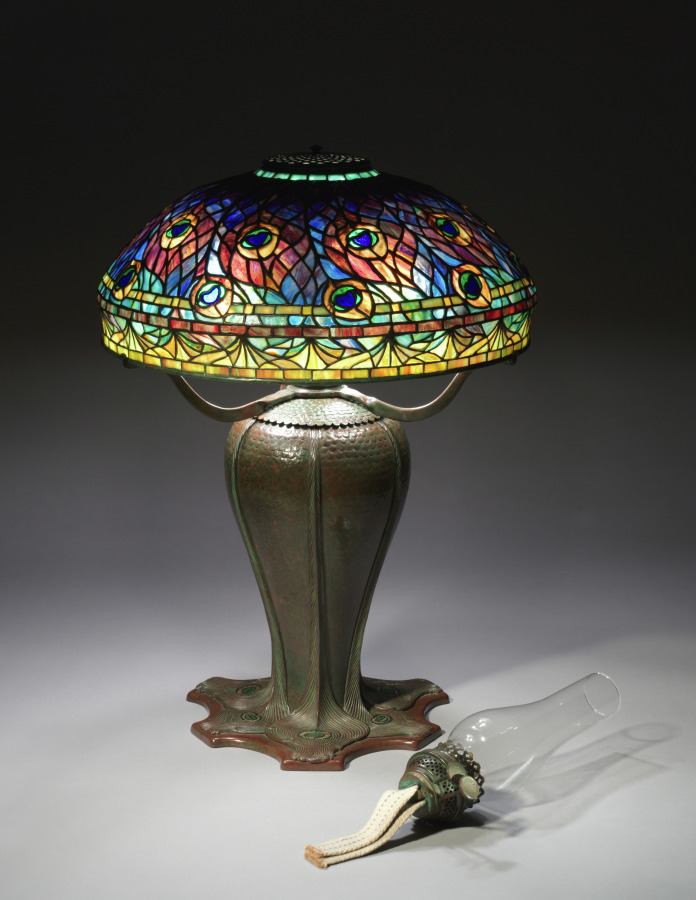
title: Peacock Table Lamp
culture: America, New York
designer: probably by Clara Wolcott Driscoll (American, 1861–1944)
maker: Tiffany Studios (United States, New York, 1902–32)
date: c. 1902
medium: Leaded glass, bronze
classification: Lamp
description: The peacock, with its brilliantly colored iridescent plumage, was a favorite motif of Louis Comfort Tiffany, appearing in almost every genre of his artistic production. The Peacock table lamp, created by Tiffany's chief lamp designer Clara Wolcott Driscoll, evokes the wide circular swath of a peacock's preening feathers and attracted critical acclaim to both Driscoll and Tiffany Studios. This particular version retains its original kerosene burning fluid apparatus as well as an electric bulb armature. Although incandescent lamp bulbs had become more widely available in the 1890s, most households, even those of the wealthy, were not yet wired for electricity. Tiffany originally designed his lamps with an oil-burning apparatus, consisting of a reservoir and a double wick and chimney, as well as an electric attachment. He cleverly predicted, though, that electric households would eventually become commonplace, so he soon moved to all-electric designs, greatly increasing the illumination and appeal of his lamps.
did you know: Originally designed to burn kerosene, this Peacock lamp still retains its original double wick and oil reservoir along with an adapter for electric light bulbs.